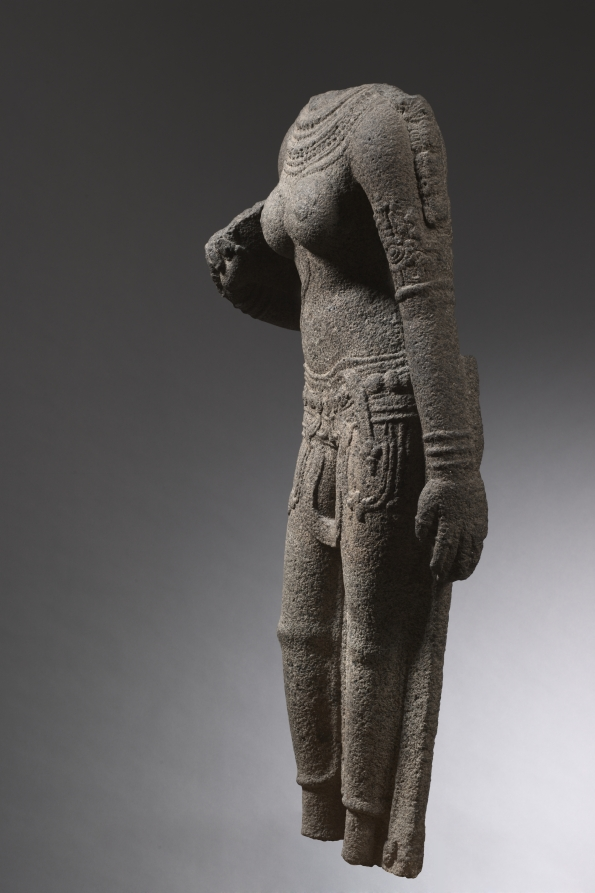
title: (Parvati) Devi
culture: South India, Chola period (900–1200s)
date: 1000s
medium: granite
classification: Sculpture